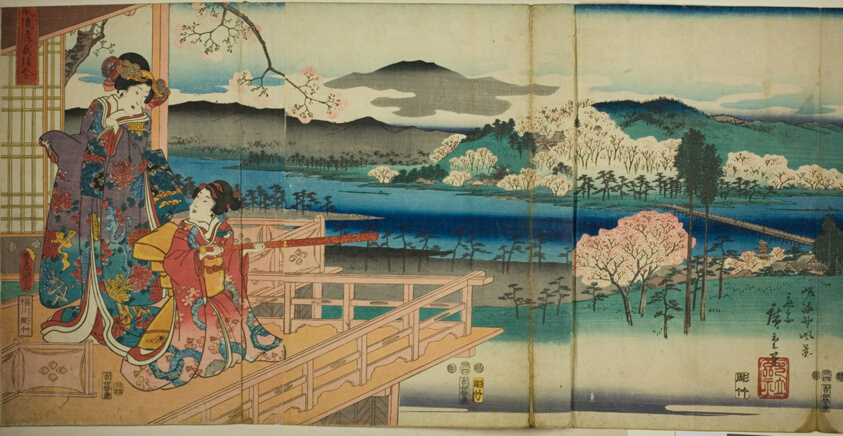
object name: Print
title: View of Sagano (Sagano fukei), from the series "A Modern Genji Picture Contest (Furyu Genji e-awase)"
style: Japanese (culture or style), edo (japanese period), Japanism, East Asian, asian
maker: Utagawa Kunisada I (Toyokuni III); Japanese, 1786-1864; and; Utagawa Hiroshige I; Japanese, 1797–1858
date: 1853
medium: Color woodblock print; oban triptych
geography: Japan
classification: woodblock print; print; asian art